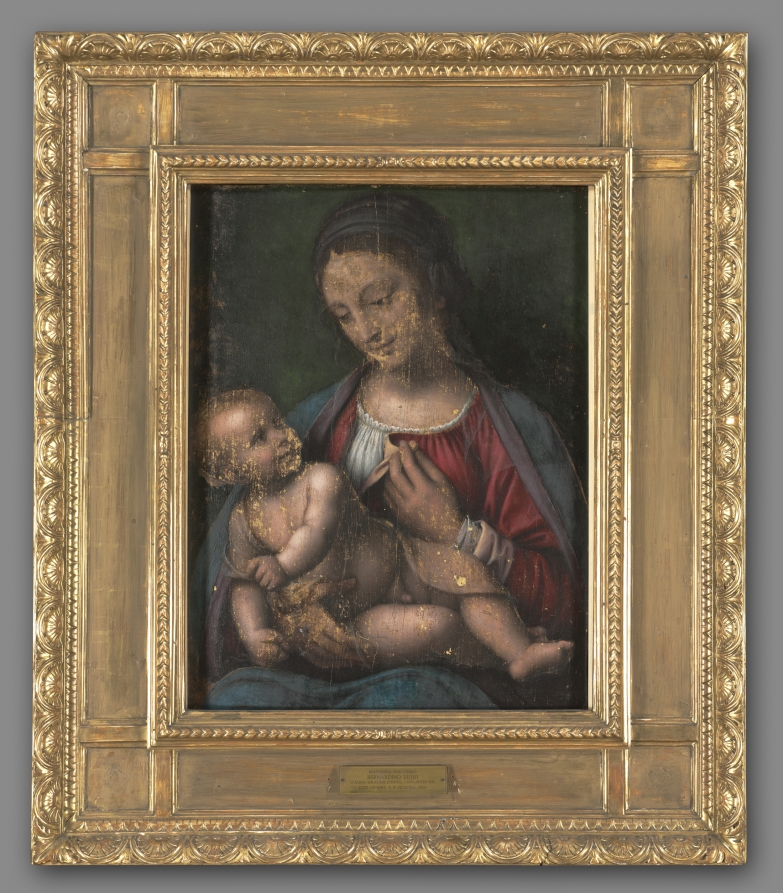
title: Virgin and Child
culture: Italy, Milan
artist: attributed to Bernardino Luini (Italian, c. 1480-c. 1532)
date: 1500s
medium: oil on wood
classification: Painting